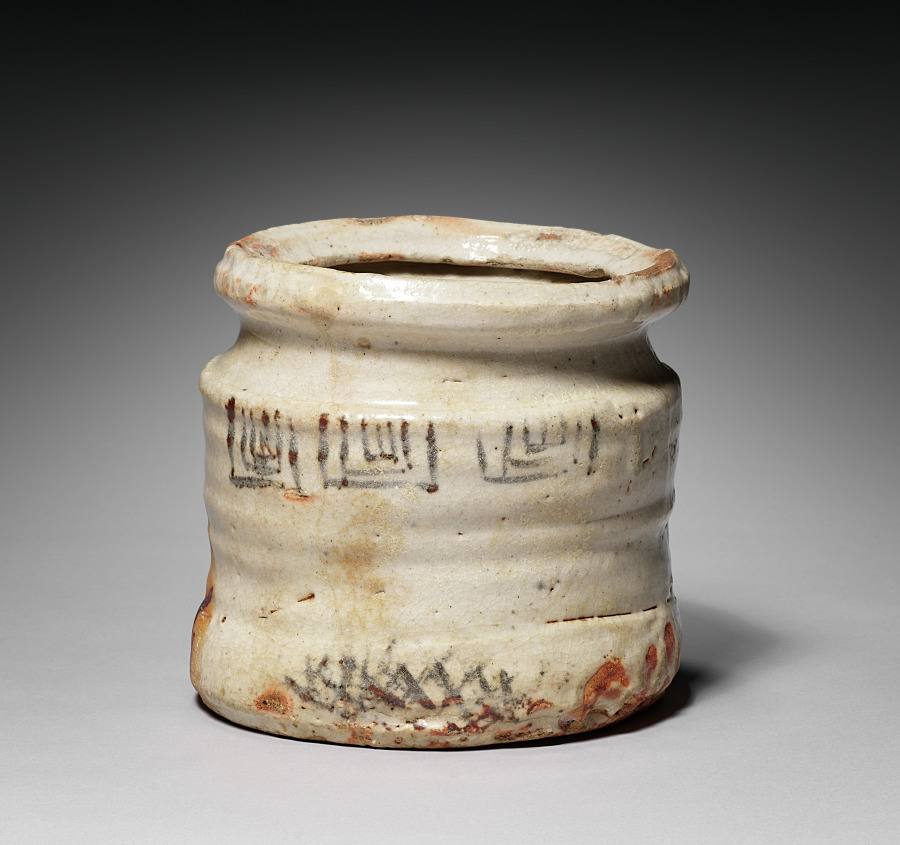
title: Water Container (Mizusashi) with Riverscape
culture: Japan, Momoyama period (1573-1615) to Edo period (1615-1858)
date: late 1500s–early 1600s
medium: Stoneware with underglaze iron oxide slip decoration (Mino ware, Shino type)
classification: Ceramic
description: Mizusashi are jars used to hold water for the preparation of tea at tea gatherings. This one was produced in the Mino area of present-day Gifu prefecture in central Japan, and is considered one of the finest of its type in existence, based on the complex aesthetic sensibilities developed around the tea ceremony in Japan. It is called a “picture Shino” (e-shino) mizusashi, as it has an abstracted design said to resemble an ink painting of reeds along a river bank and small boats in a river on one side, and a geometric pattern on the other. With its irregular shape and thick, luminous glaze, it is of a variety favored by eminent tea masters of the Momoyama period.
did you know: The water this container held during a tea ceremony was used to fill the kama, or iron pot in which the water is heated.